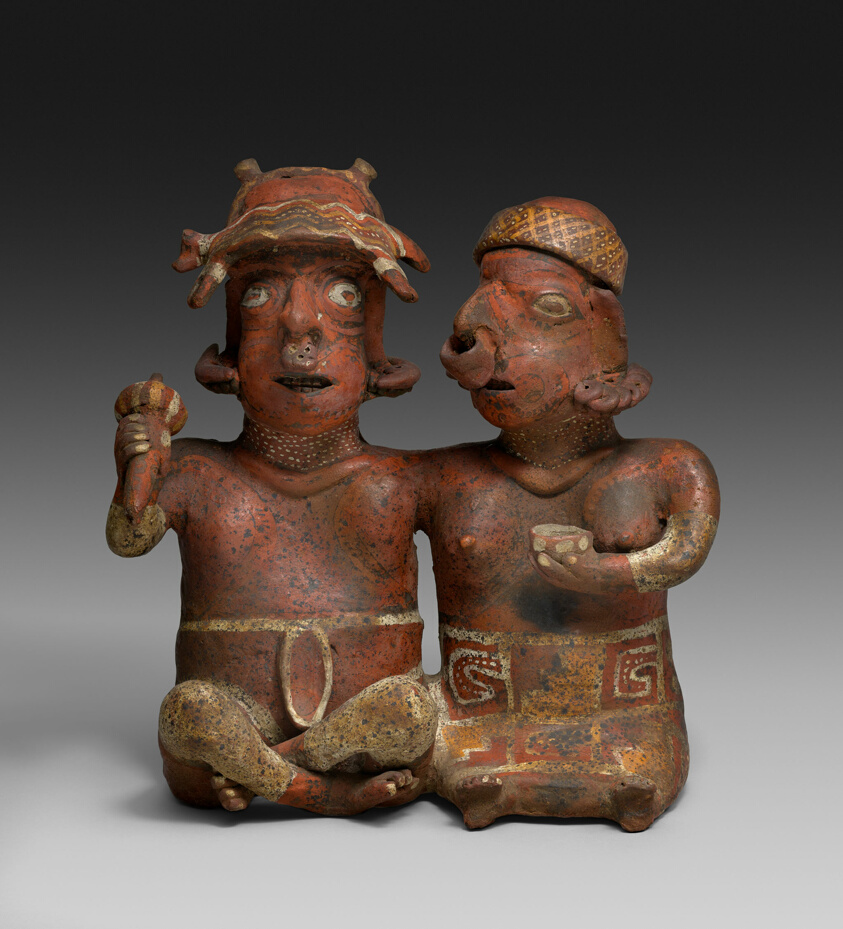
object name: Sculpture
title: Seated Joined Couple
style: nayarit, mesoamerican, Pre-Columbian, americas, west mexico, Arts of the Americas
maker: Nayarit (Nayarit, Mexico)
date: 200 BCE–300 CE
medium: Ceramic and pigment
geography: Nayarit state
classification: earthenware; art of the americas; ceramics; sculpture; funerary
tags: people, ancestors, ritual, marriages/weddings, offering, feast, musical instruments